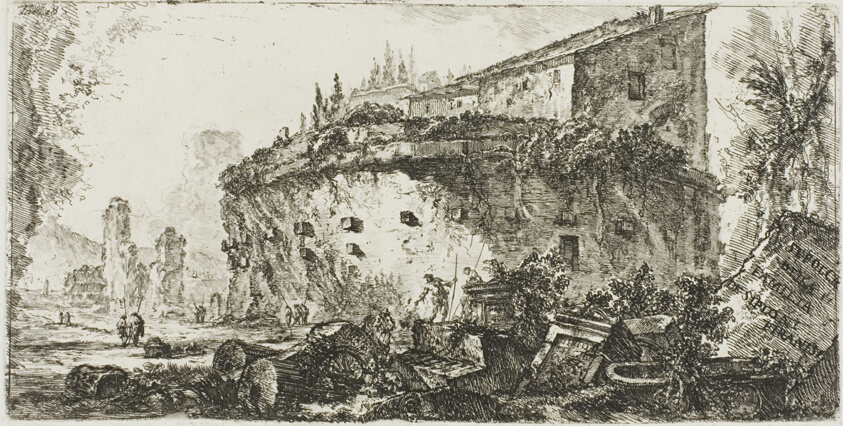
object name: Print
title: Tomb of the Scipios, plate 18 from Some Views of Triumphal Arches and other arches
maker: Giovanni Battista Piranesi (Italian, 1720-1778)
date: 1748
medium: Etching on ivory laid paper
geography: Italy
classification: etching; print; prints and drawing